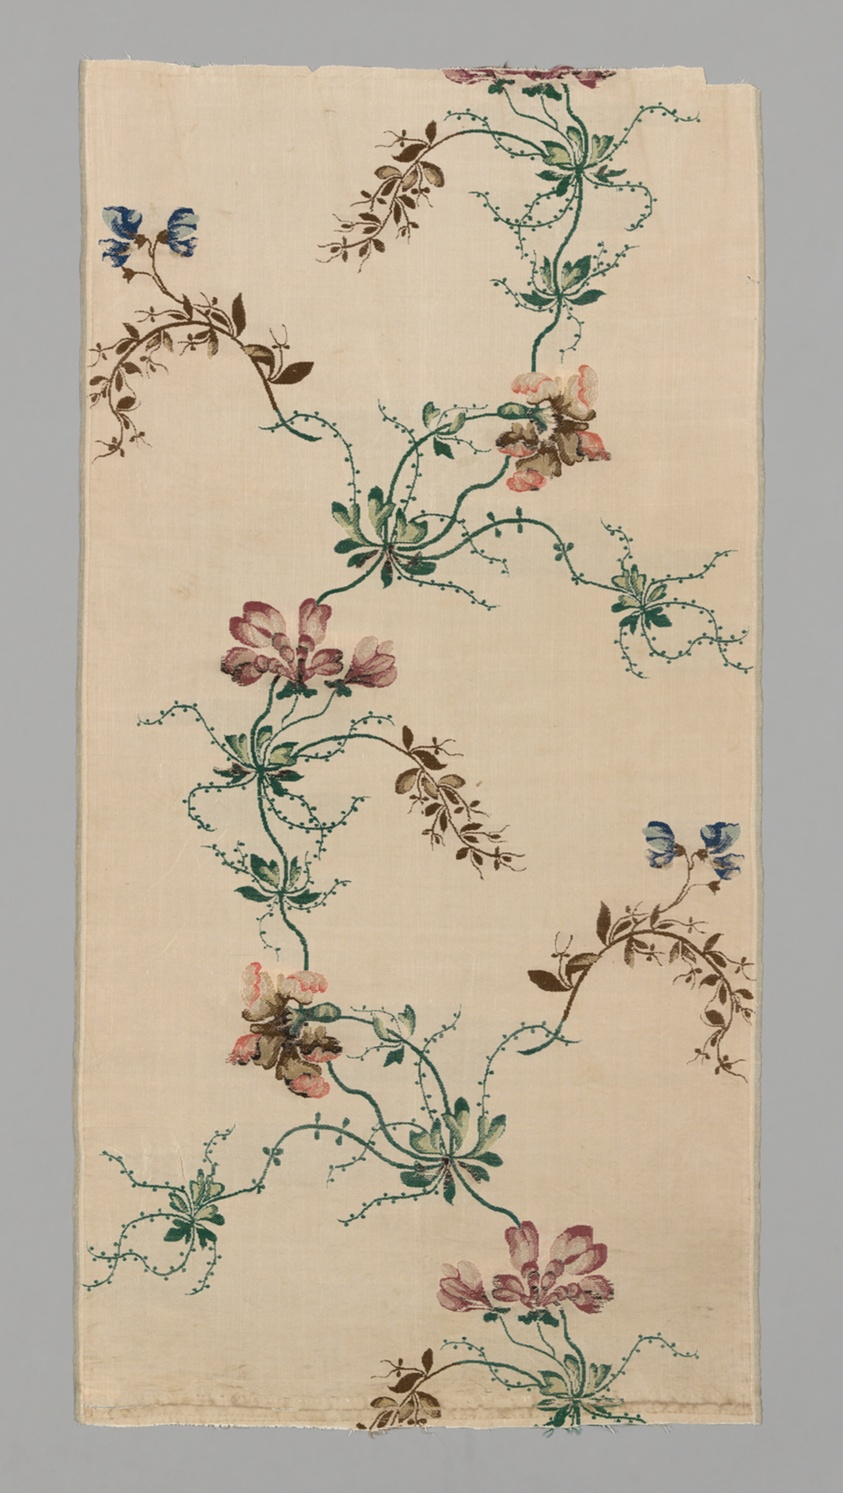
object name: Costume and Accessories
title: Panel (From a Skirt)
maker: Possibly designed by Anna Maria Garthwaite (English, 1720–1756); England, Spitalfields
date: 1741/42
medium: Silk, plain weave with weft-float faced 2:1 twill interlacings of secondary binding warps and brocading wefts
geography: England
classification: textile; weaving; costume